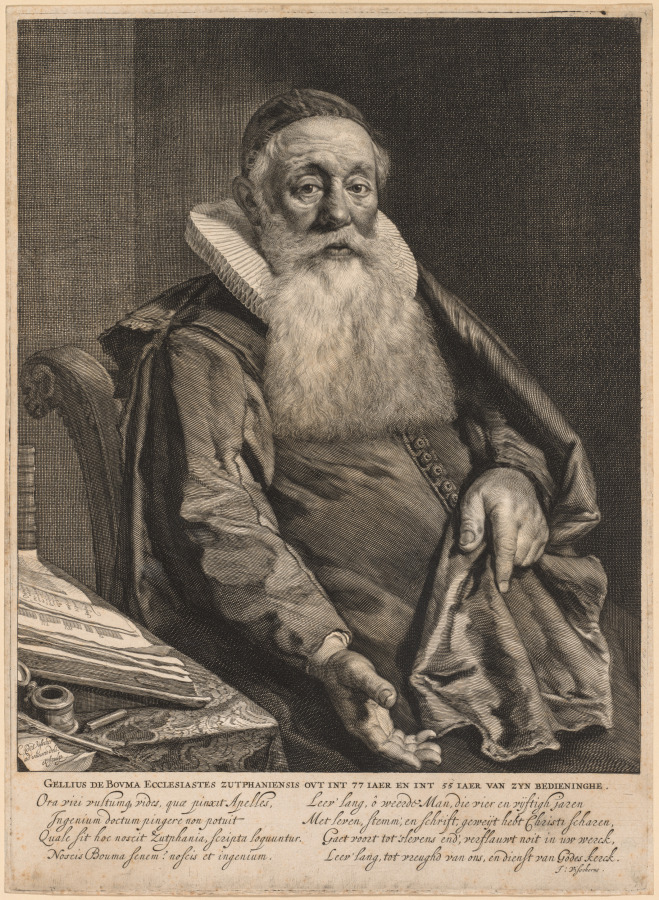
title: Gellius de Bouma, Minister of the Gospel at Zutphen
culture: Netherlands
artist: Cornelis de Visscher (Dutch, 1628/29–1658)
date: c. 1656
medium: engraving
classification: Print